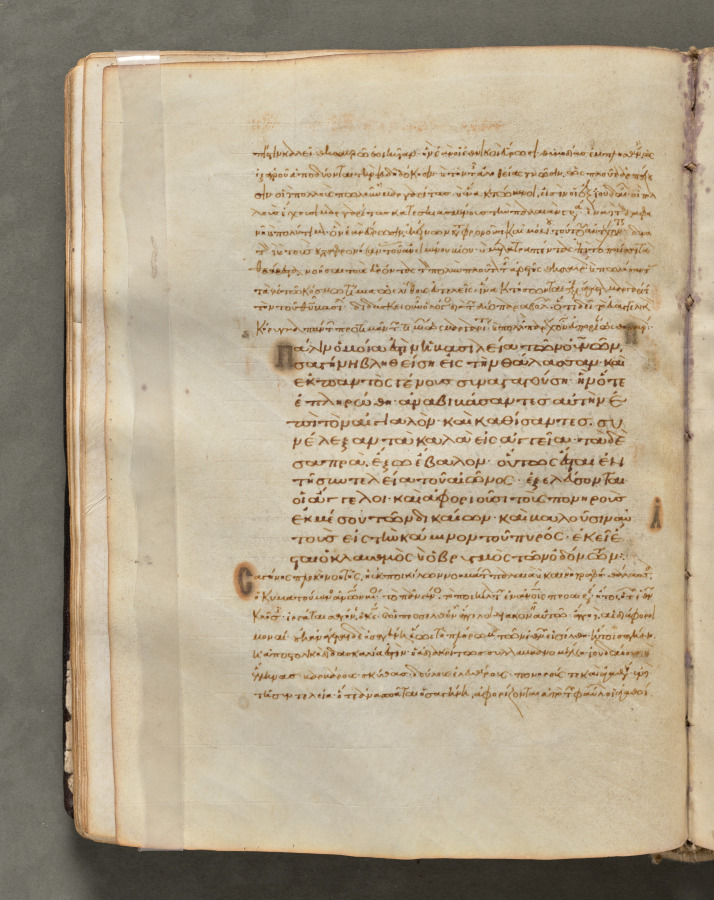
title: Text, folio 62 (verso), from a Gospel Book with Commentaries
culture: Byzantium, Constantinople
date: c. 1000–1100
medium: ink, tempera, and gold on vellum; leather binding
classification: Bound Volume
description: Each of the four gospels in this book opens on a page with brilliantly illuminated borders depicting the author of the text as well as birds-principally peacocks, symbols of the immortality of the soul-and fountains, representing the fountain of life and the salvation of the soul. This volume consists of 428 leaves with texts in Greek. Its level of sophistication suggests that it was probably written and decorated in a monastery in Constantinople.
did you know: Gospel Books were carried in procession through Byzantine churches.